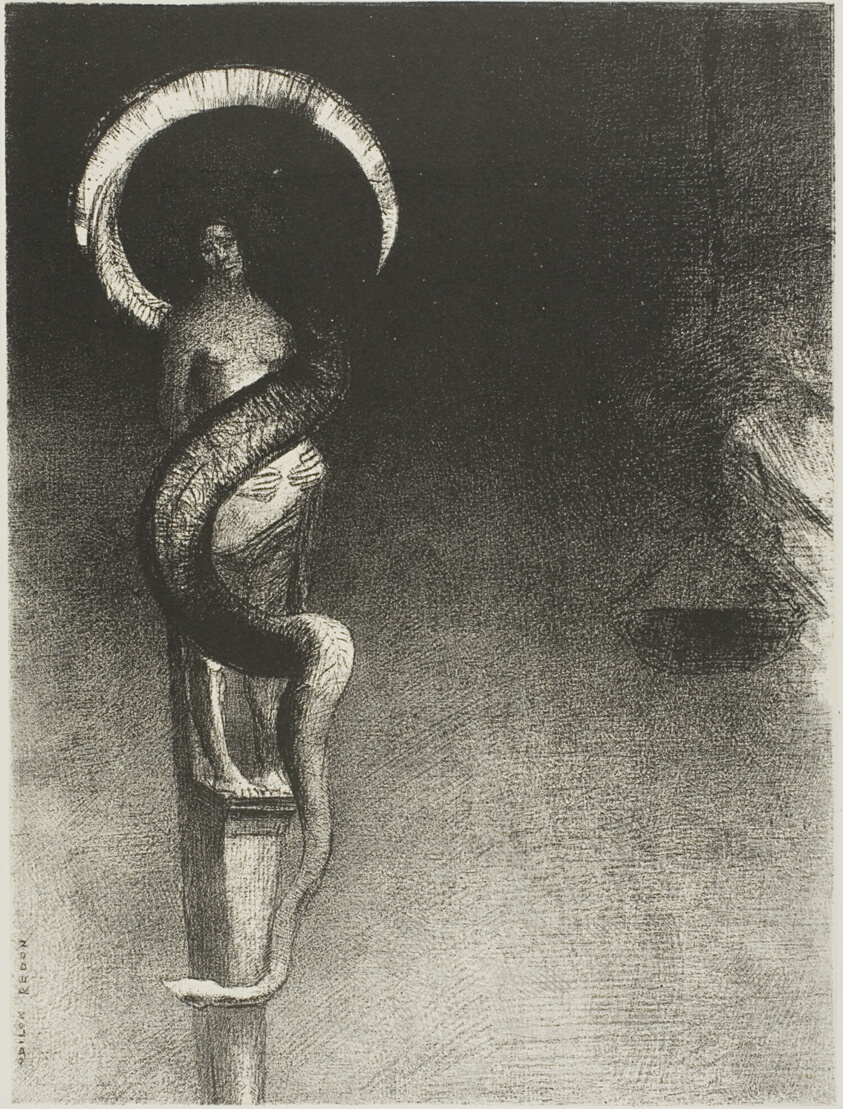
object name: Print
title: Serpent-Halo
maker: Odilon Redon (French, 1840-1916)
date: 1890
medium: Lithograph in black on ivory China paper laid down on ivory wove paper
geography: France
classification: lithograph; print; prints and drawing; paper